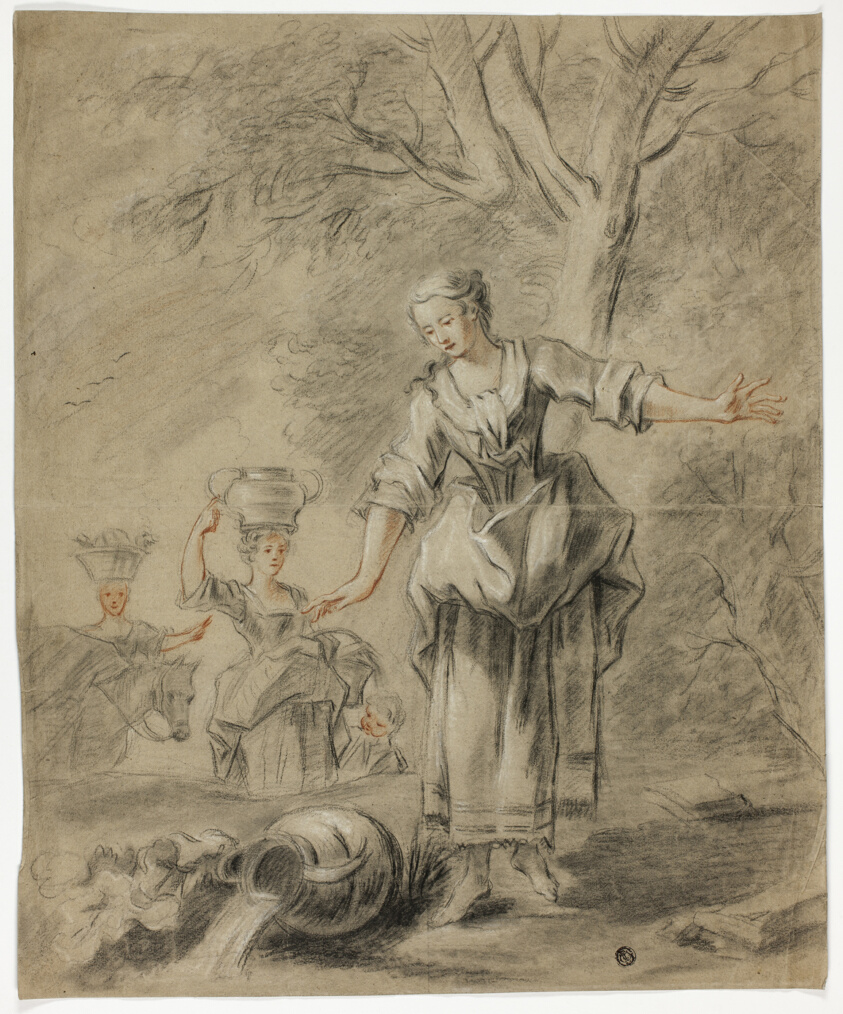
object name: Drawing and Watercolor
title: Illustration for La Fontaine's Pierrette et le Pot-au-Lait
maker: Follower of François Boucher (French, 1703-1770)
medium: Black chalk and red chalk with stumping, heightened with touches of white chalk, on buff laid paper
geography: France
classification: chalk; drawings (visual works); prints and drawing; paper